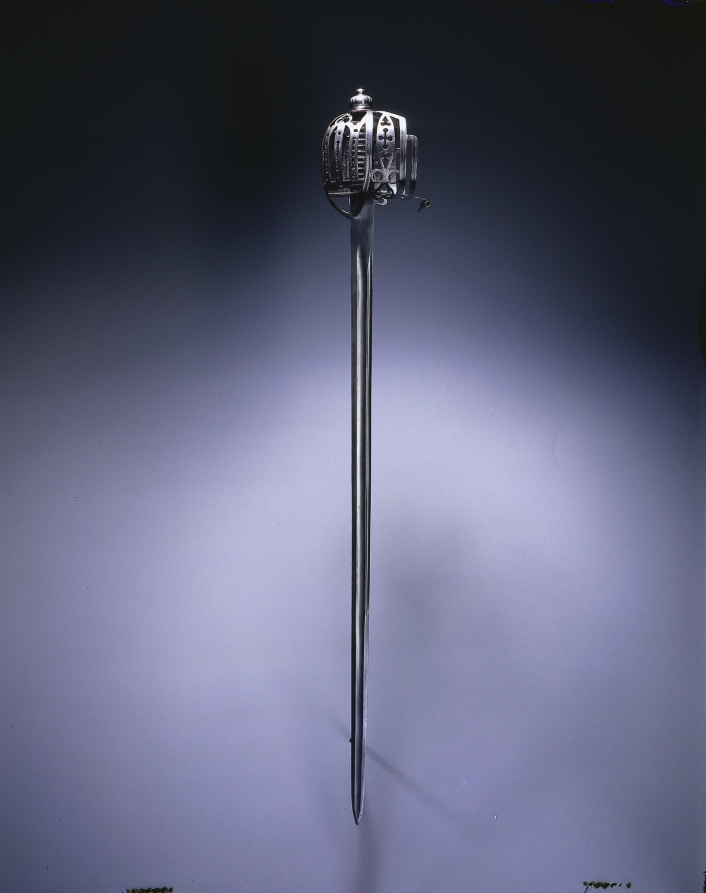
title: Basket-Hilt Broadsword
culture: Scotland, Stirling(?), 18th century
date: c. 1740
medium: steel, pierced hilt; wood and leather grip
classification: Arms and Armor